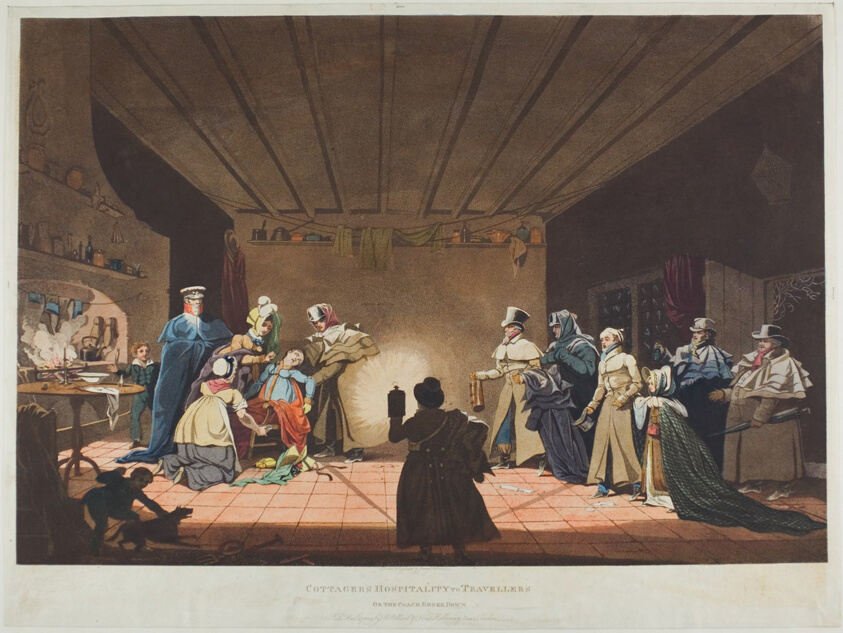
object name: Print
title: Cottagers' Hospitality to Travellers or The Coach Broke Down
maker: James Pollard (English, 1797-1867); published by R. Pollard & Sons (English, active 19th century)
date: published March 27, 1819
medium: Aquatint in black, with hand-coloring, on paper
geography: England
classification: aquatint; print; prints and drawing